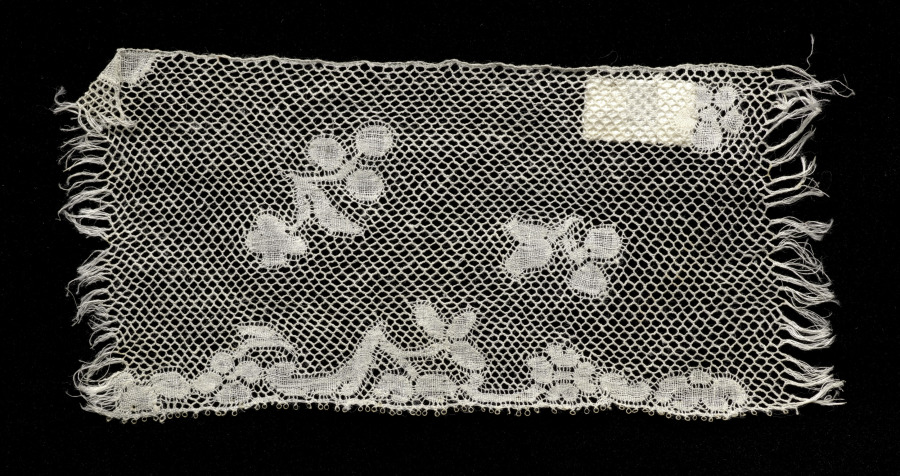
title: Lace Edging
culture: France, Valenciennes or Flanders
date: 1700s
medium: Linen: bobbin lace (Valenciennes)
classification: Lace